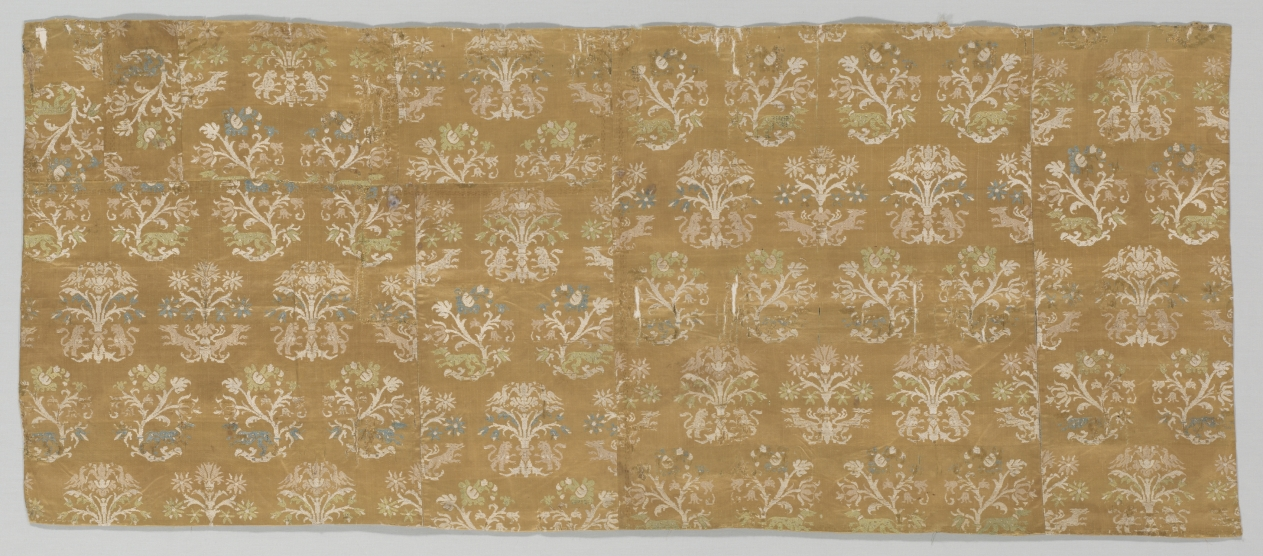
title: Textile Panel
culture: Italy, 17th century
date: 1600s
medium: plain compound satin; silk and metal thread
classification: Textile